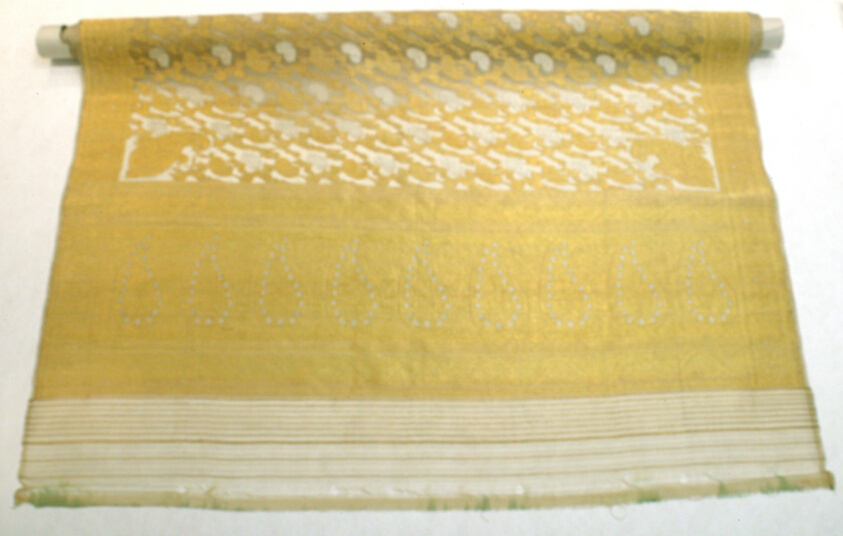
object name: Costume and Accessories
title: Sari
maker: India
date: 19th century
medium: White with gold and white palmette design, gold band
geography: India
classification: textile; weaving; costume; dress (garment); clothing; sari (garment)